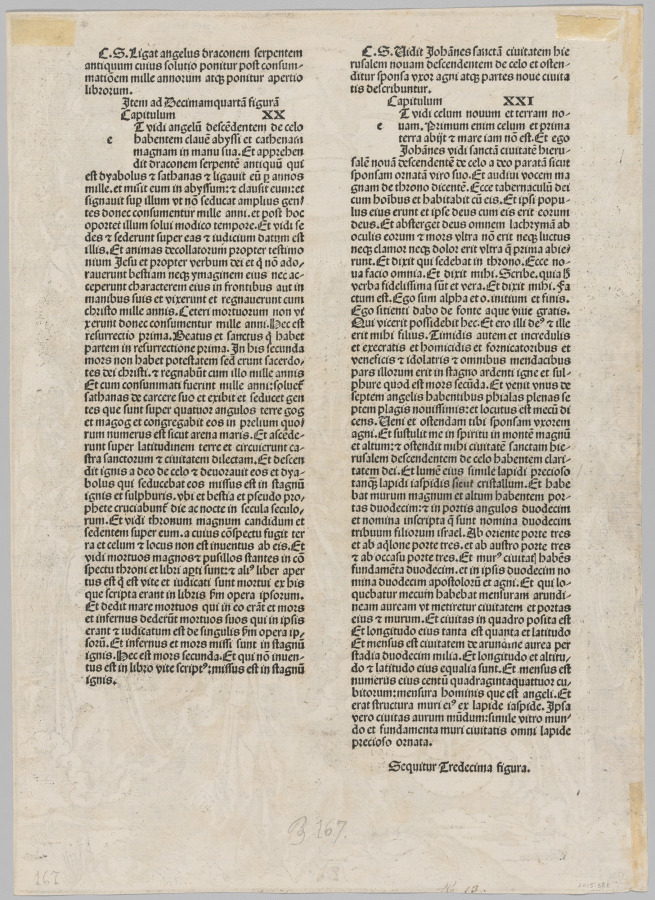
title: Apocalypse: The Adoration of the Lamb—The Hymn of the Chosen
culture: Germany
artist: Albrecht Dürer (German, 1471–1528)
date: c. 1496–97, printed 1511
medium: woodcut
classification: Print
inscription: On plate, lower center, monogram: AD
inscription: Verso: in graphite: lower left: 167; lower center: B167.; lower right, in ink: No. 13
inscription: Verso: Two columns of Latin text